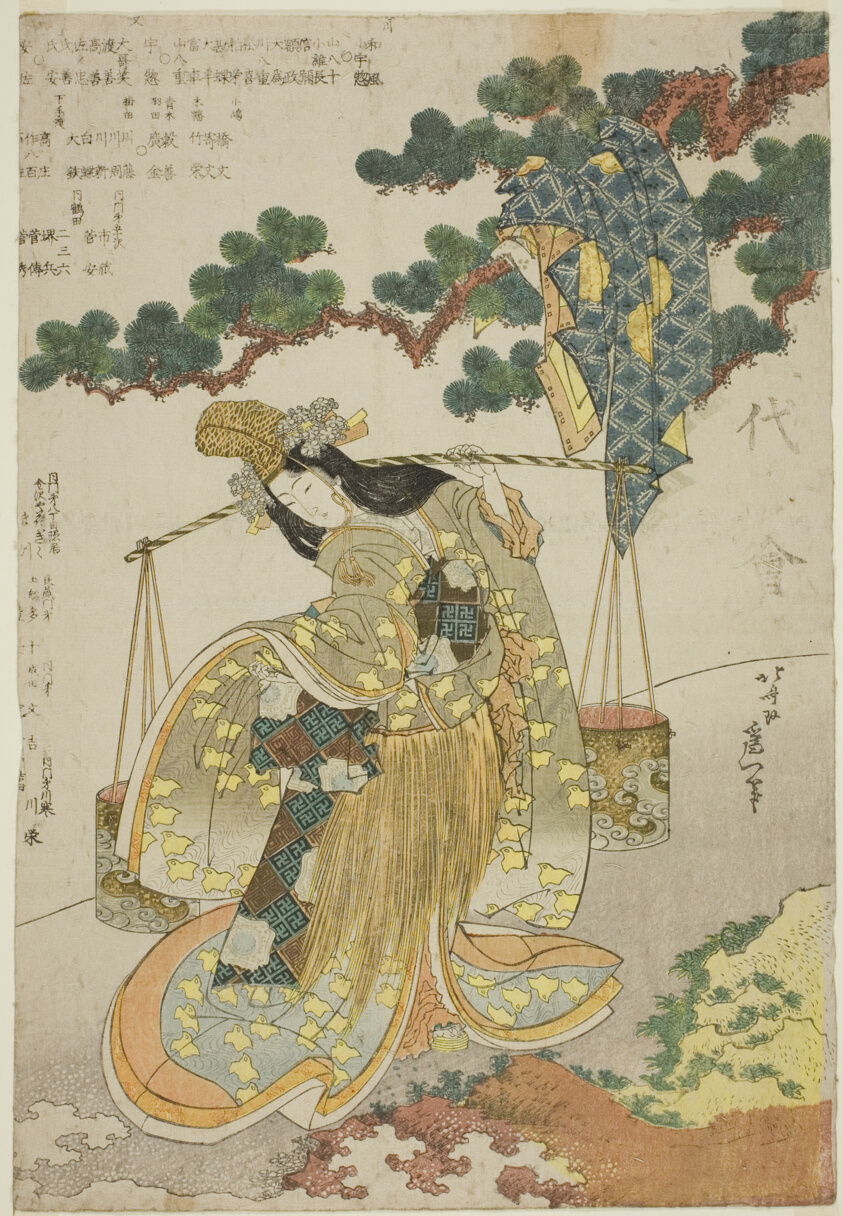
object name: Print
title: The Brine Maiden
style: Japanese (culture or style)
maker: Katsushika Hokusai 葛飾 北斎; Japanese, 1760-1849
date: 1830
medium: Color woodblock print; surimono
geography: Japan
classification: woodblock print; print; asian art